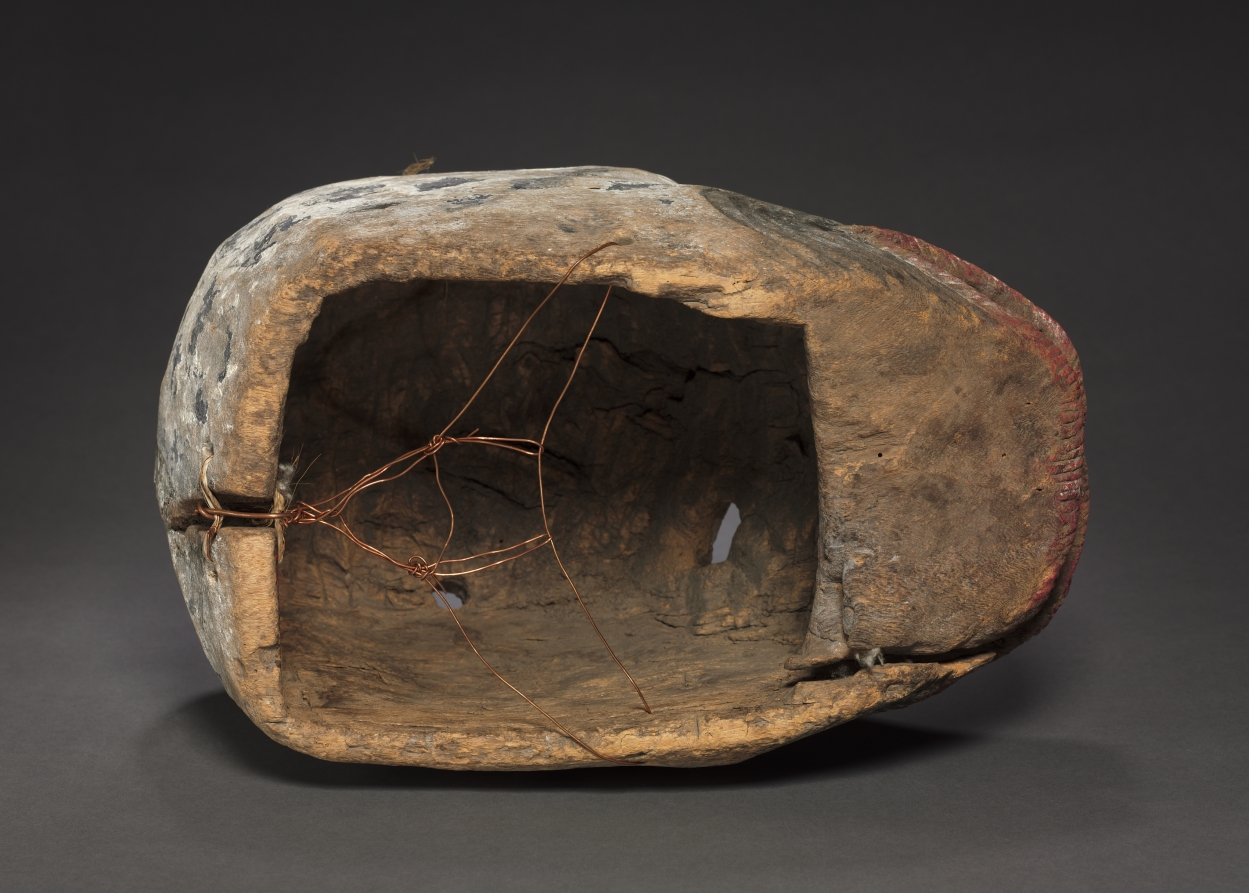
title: Mask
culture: Mexico, Paintla, 19th century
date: 1800s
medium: wood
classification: Sculpture